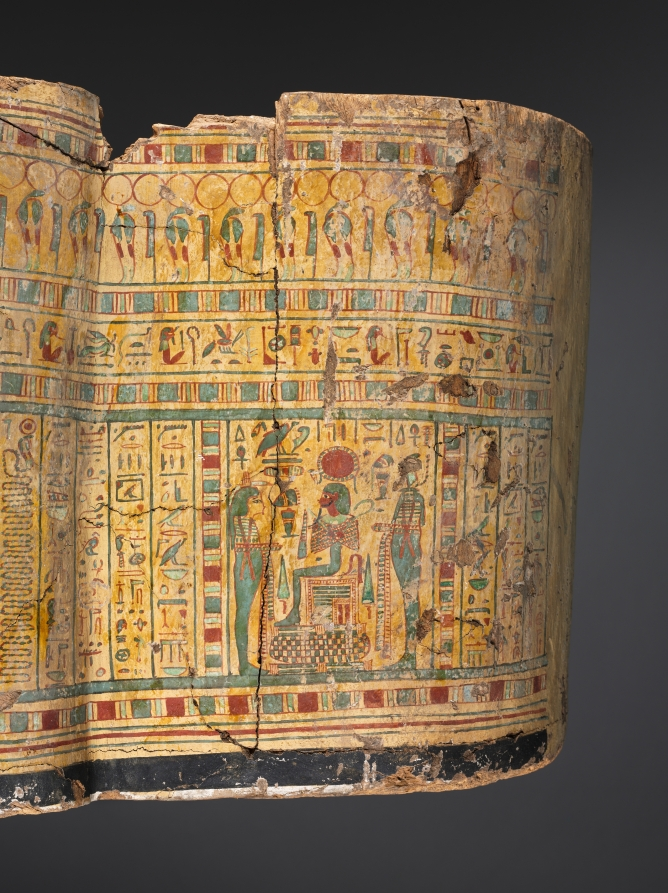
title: Coffin of Nesykhonsu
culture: Egypt, Thebes, Third Intermediate (1069–715 BCE), Dynasties 21–22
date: c. 976–889 BCE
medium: gessoed and painted sycamore fig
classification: Funerary Equipment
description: Egyptian coffins told stories and illustrated spells to help the deceased transition safely to the afterlife. Inside Nesykhonsu's coffin there are two jackals, one facing right and the other left, near the top. Here, the jackal represents the powerful deity Anubis, the god of the afterlife and embalming.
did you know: Two of Nesykhonsu's titles, "Lady of the House" and "Singer of the Choir of Mut the Great," are written on the outside of the coffin.